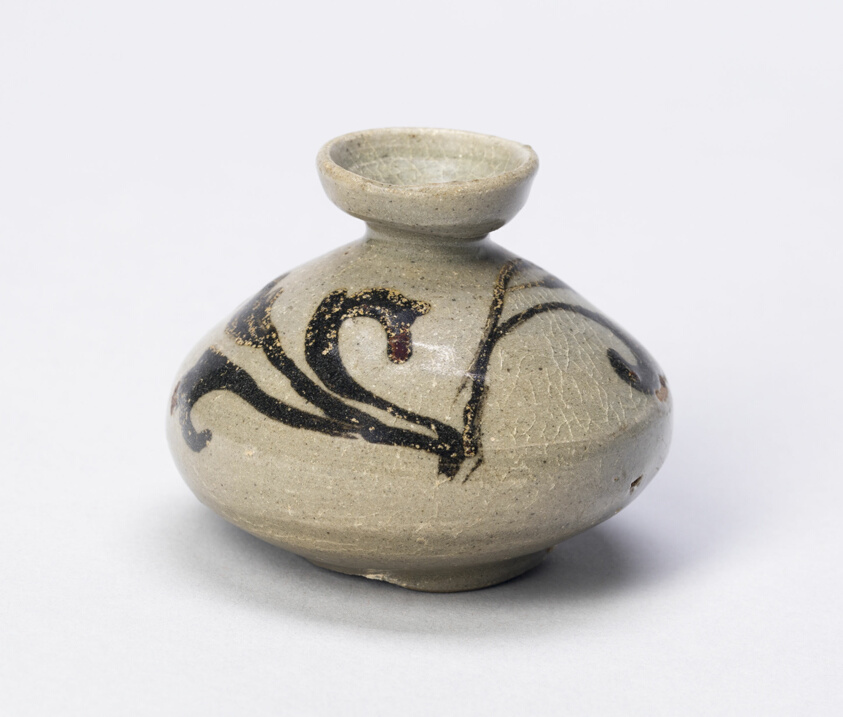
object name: Vessel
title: Oil Bottle with Floral Motifs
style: Korean (culture or style)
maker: Korea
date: Goryeo dynasty (918–1392), early 11th century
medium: Stoneware with celadon glaze and iron-brown underglaze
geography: South Korea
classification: vessel